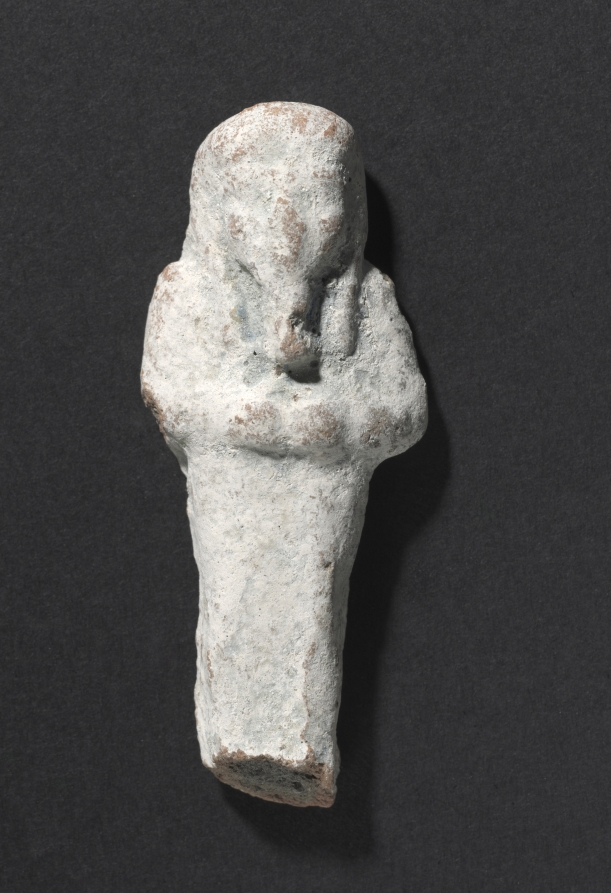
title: Shawabty of Ditamenpaankh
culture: Egypt, Late period (715–332 BCE), Dynasty 25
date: 715–656 BCE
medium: terracotta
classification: Funerary Equipment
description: High demand for shawabtys in the Late Period, a time when as many as 400 or more shawabtys were placed in the tomb with the deceased, gave rise to a specialized container for storing them: the shawabty box. This example is inscribed for the lady of the house, Ditamenpaankh, and was probably one of a pair originally made for her. The single-masted boat on the box's lid is perhaps an allusion to the pilgrimage of the deceased to the holy city of Abydos, the cult city of Osiris, king of the dead. The shawabtys inside are crude, mass-produced examples cast in an open mold. Made of terracotta, their blue paint imitates more costly shawabtys made of faience. As for the shawabty spell, it has been removed from its traditional location on the shawabty's front and relocated onto the sides of box, where it needed only to be written once, thus expediting production.